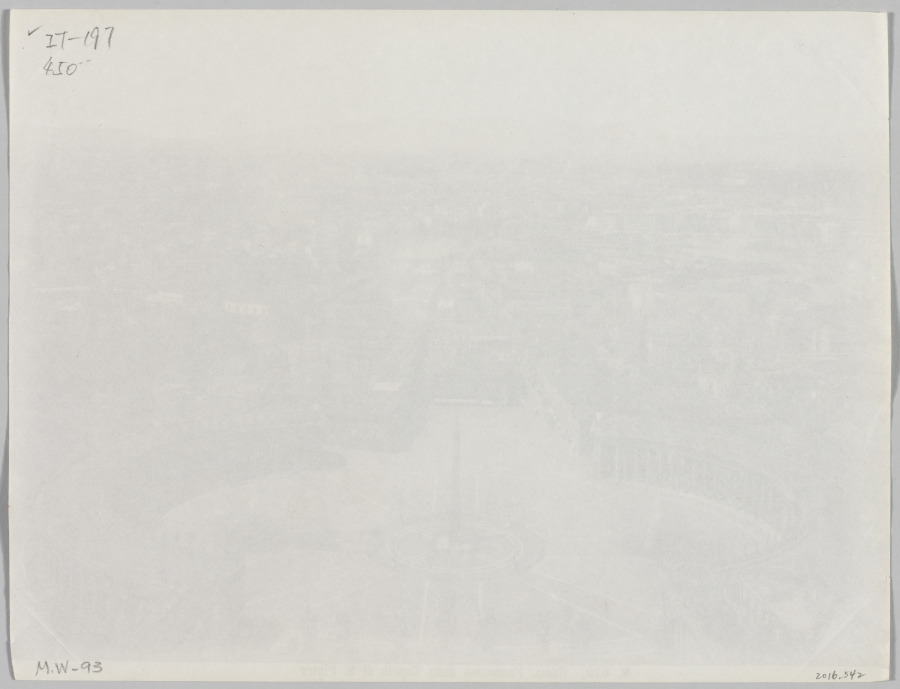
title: Panorama dalla Cupola di S. Pietro, Rome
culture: Italy, 19th century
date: 1885–95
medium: albumen print from collodion negative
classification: Photograph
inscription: Imprinted on recto of photograph: “N. 820. Roma. Panorama dalla Cupola di S. Pietro” Written in pencil on verso: “IT-197/450” Written in pencil on verso: “M.W.-93”